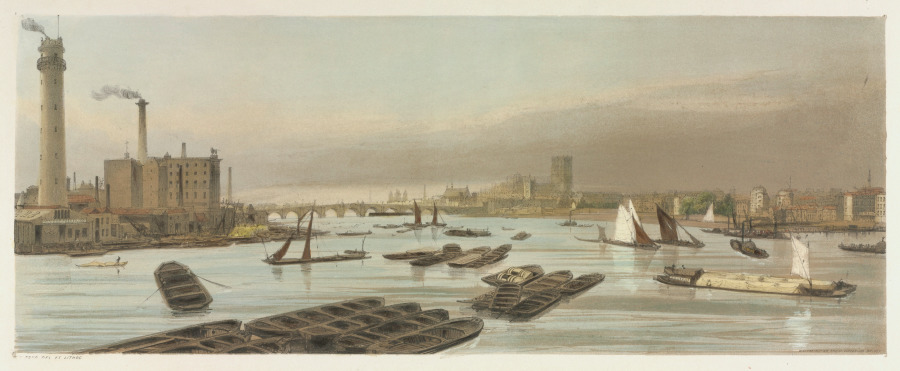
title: London As It Is: Westminster, from Waterloo Bridge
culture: England, 19th century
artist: Thomas Shotter Boys (British, 1803–1874)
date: 1842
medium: lithograph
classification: Bound Volume